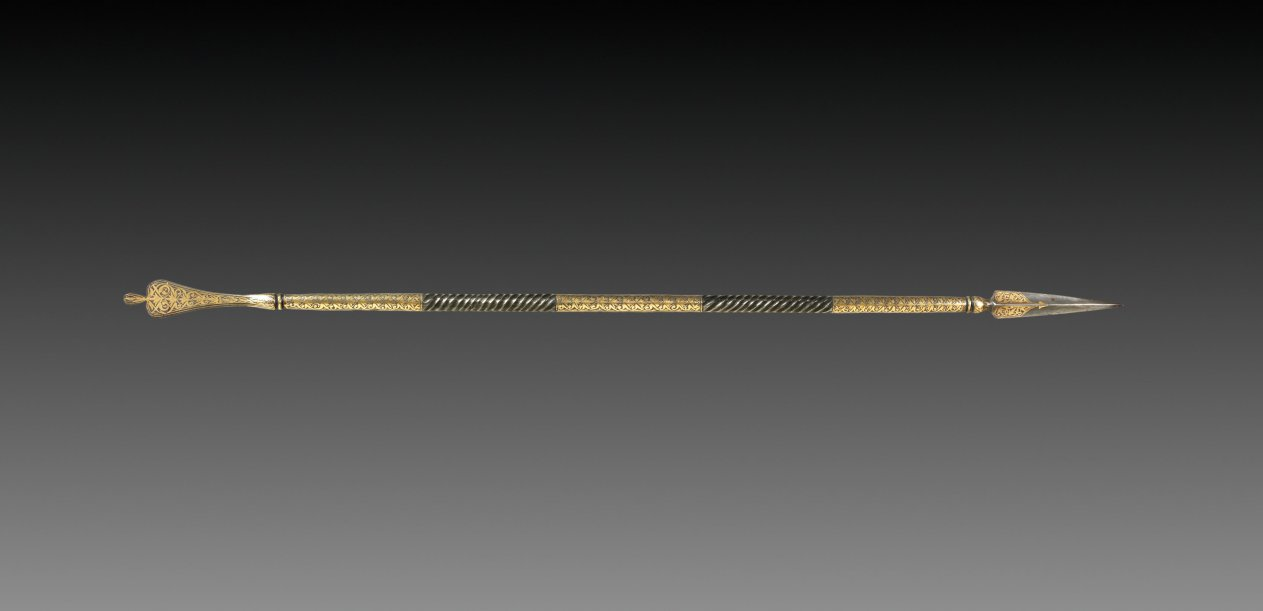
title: Javelin with Concealed Poignard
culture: Iran (?), 19th century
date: 19th Century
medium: steel inlaid with gold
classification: Arms and Armor